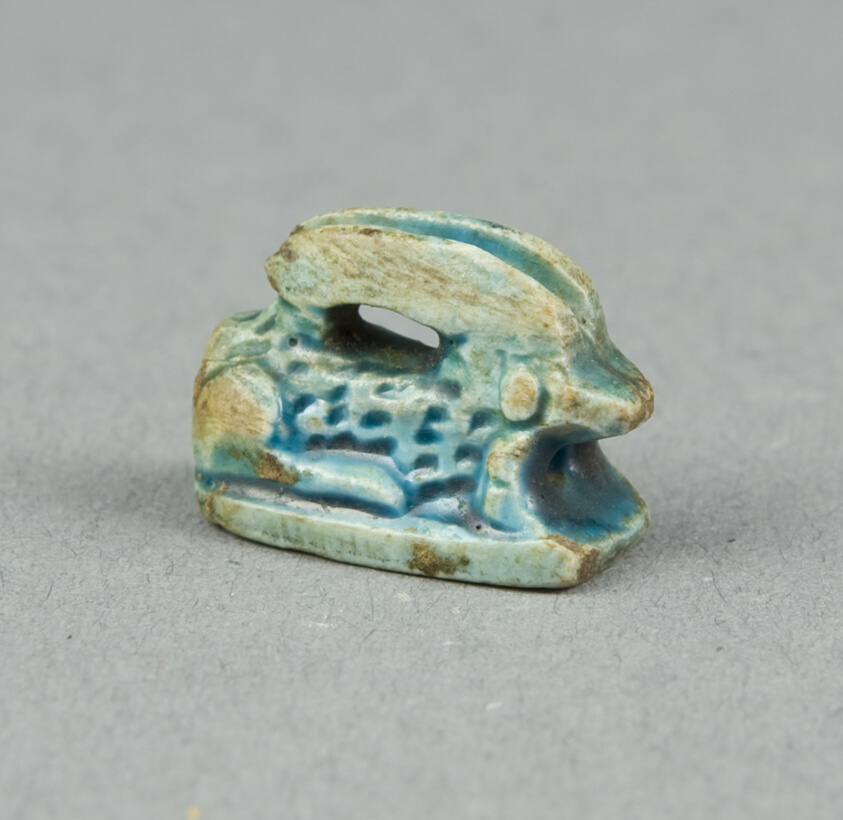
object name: Costume and Accessories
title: Amulet of a Hare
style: late period (egyptian), egyptian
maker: Egyptian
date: Late Period (664–332 BCE)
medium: Glazed steatite?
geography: Egypt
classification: amulet; jewelry; ancient art; costume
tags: hares